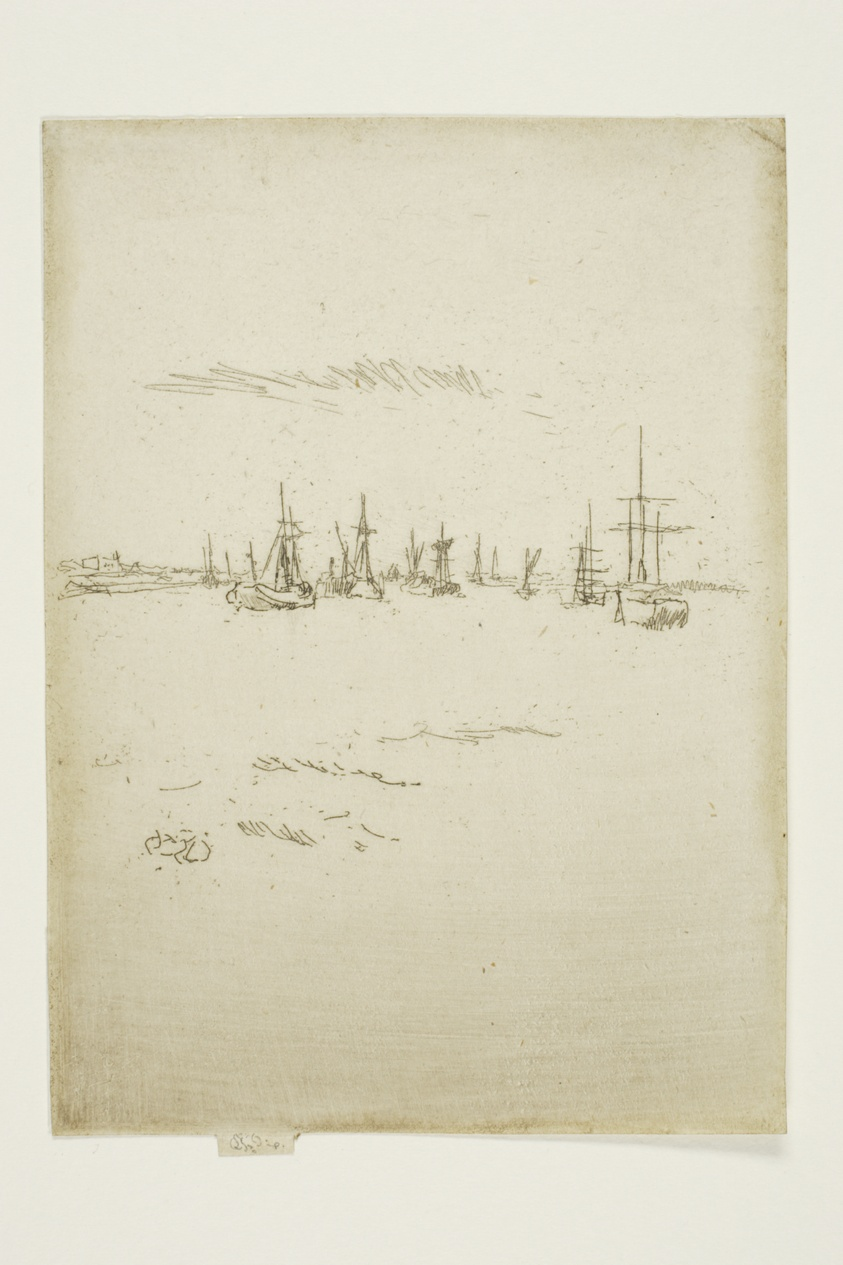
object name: Print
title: Return to Tilbury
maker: James McNeill Whistler (American, 1834-1903)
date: 1887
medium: Etching and drypoint with foul biting in black ink on cream laid paper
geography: United States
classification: etching; foul biting; print; prints and drawing; drypoint; paper